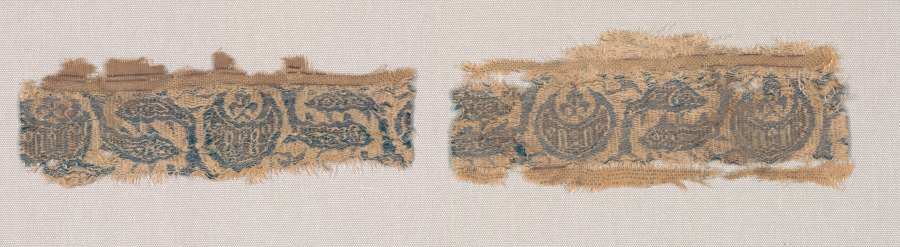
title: Fragment of a Band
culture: Egypt or Syria, Mamluk period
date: 1300–1350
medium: compound tabby, double cloth, and bands of extended tabby; silk and gold filé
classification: Textile